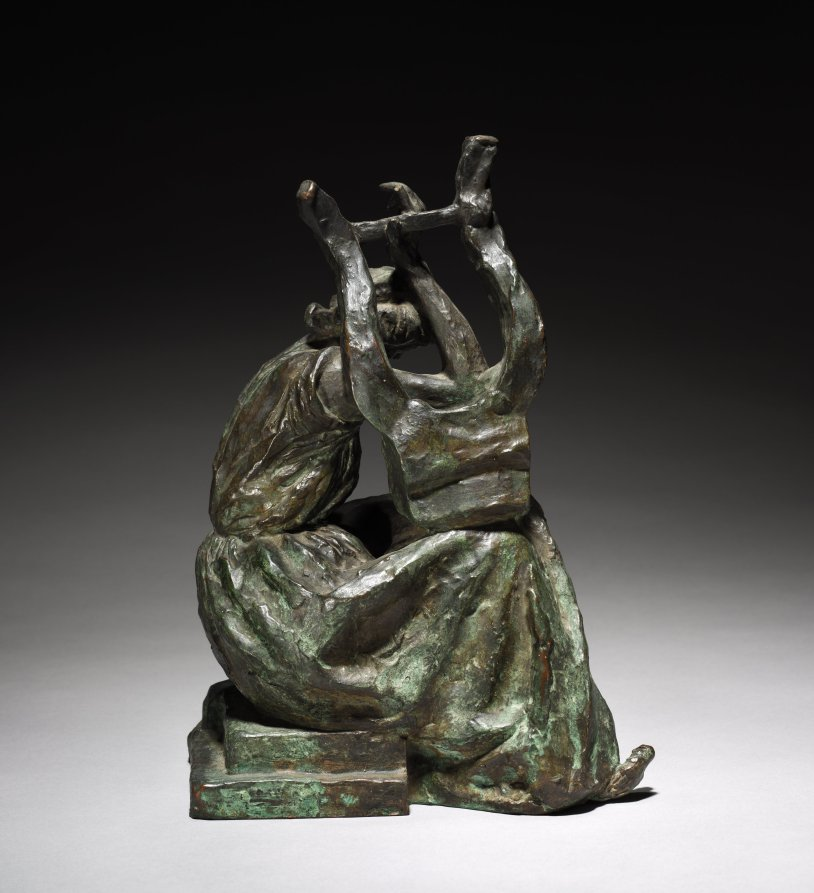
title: Sappho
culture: France, 19th century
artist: Emile Antoine Bourdelle (French, 1861–1929)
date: 1887–1925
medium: bronze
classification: Sculpture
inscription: Inscribed on back: "Alexis Rudier, Fondeur, Paris"; on right side: "E. A. Bourdelle"